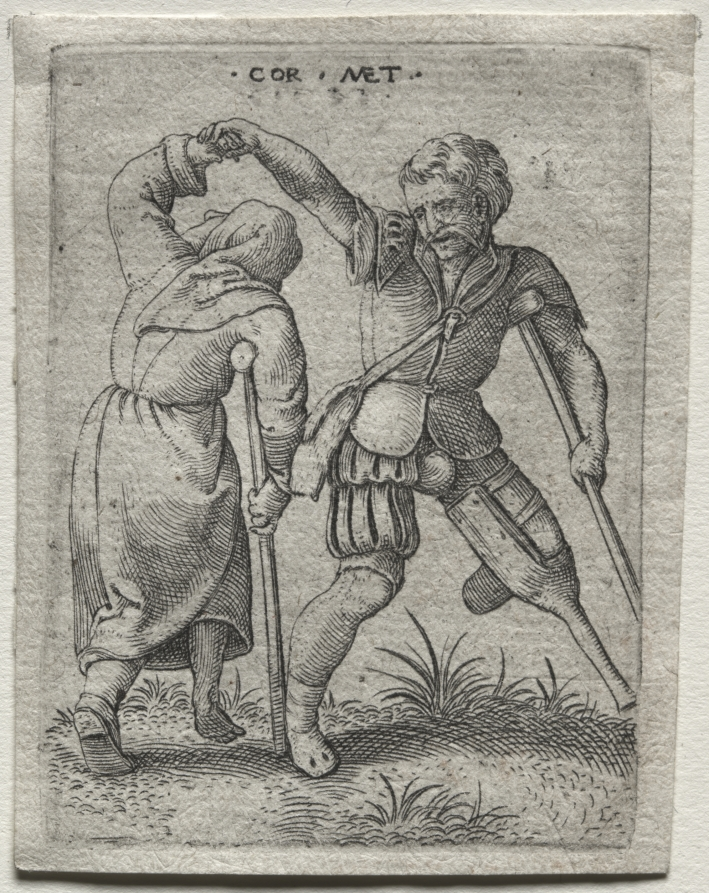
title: Dancing Cripples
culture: Flanders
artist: Cornelis Massys (Flemish, 1510/11–1556/57)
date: 1538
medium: engraving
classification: Print